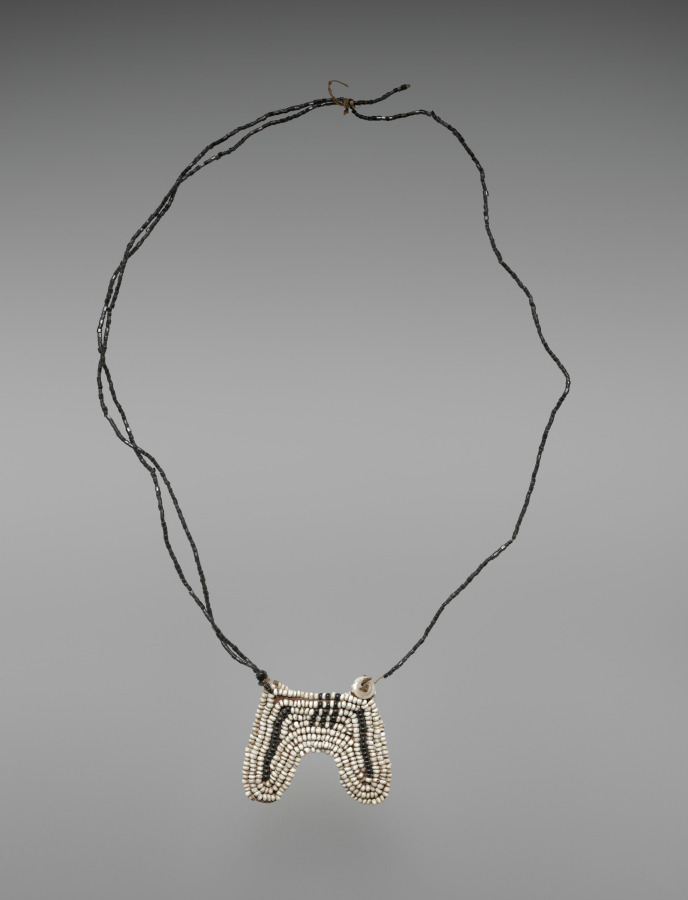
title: Royal ceremonial beadwork: pendant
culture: Africa, Southern Africa, South Africa, Southeast Cape Region, Unknown female Xhosa-style maker(s)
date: 1800s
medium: Glass beads, sinew, and ceramic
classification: Mixed Media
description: Elite Xhosa women once wore beaded garments like this on festive occasions. Made almost completely from imported Venetian or Bohemian glass beads, they were overt status symbols. Imported beads functioned as money for the Xhosa between about 1770 and 1829. These garments’ female maker carefully selected beads of the highest quality, uniform in color, shape, and size. Made in the same shape as the pendant, a swallowtail-shaped apron (CMA 2010.206) worn under the skirt completed the ensemble.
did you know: The beads to make an ensemble like this cost several cattle in the early 1800s, an amount most couldn't afford.